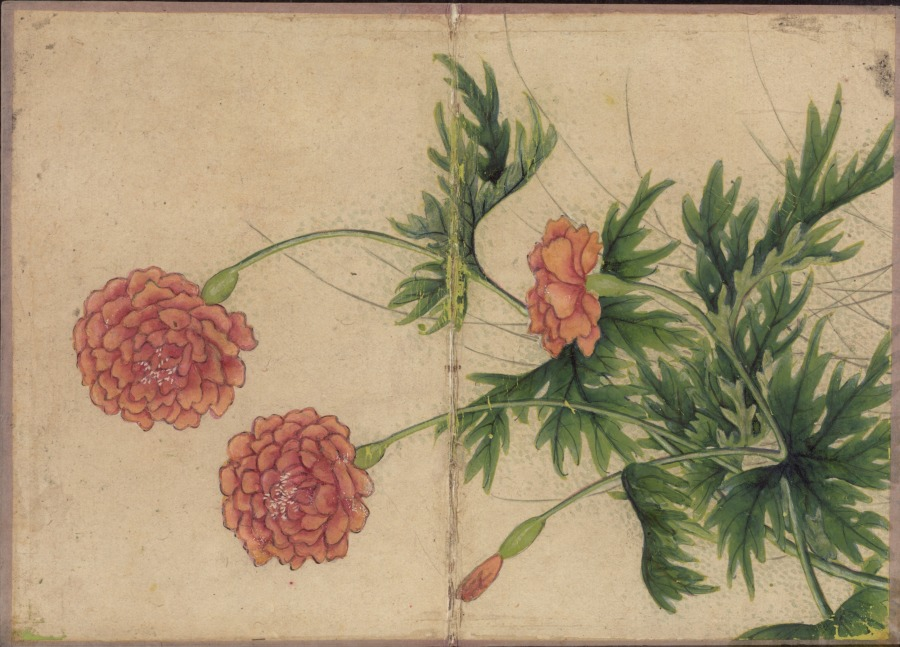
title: Desk Album: Flower and Bird Paintings (Peony)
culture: China, Qing dynasty (1644-1911)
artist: Zhang Ruoai (Chinese, 1713–1746)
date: 1700s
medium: album leaf, ink and color on paper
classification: Painting